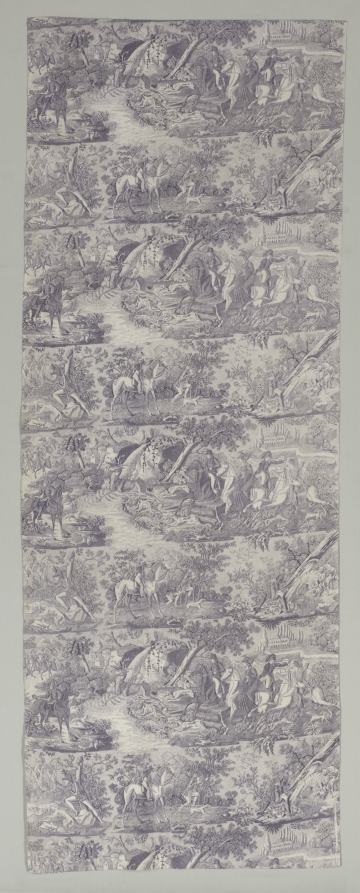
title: Hunting Scene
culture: France, early 19th century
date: early 1800s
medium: copperplate printed cotton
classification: Textile